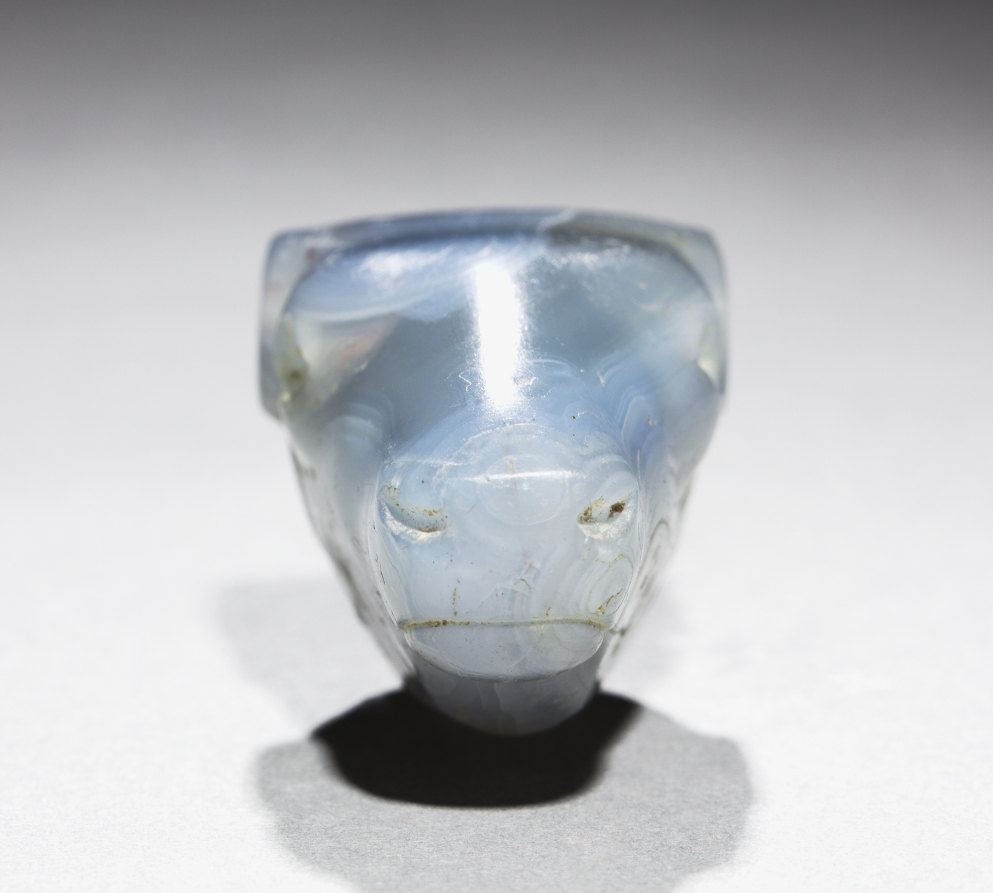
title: Head of a Bull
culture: Mesopotamia, Sumerian, Iraq, Tigris-Euphrates valley, Early Bronze Age I (c. 3300–c. 3000 BCE)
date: 3000–2000 BCE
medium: chalcedony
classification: Sculpture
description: This bull head is carved in a banded stone. The sculptor has ingeniously planned the work so that the veins of the stone enhance the anatomy of the head. Inlays of stone, ivory, or gold (now missing) were set into the eyes and horn sockets. The other holes were used to attach the head to a body of a different material.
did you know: This object is made of quartz, which is used to make electronics today.